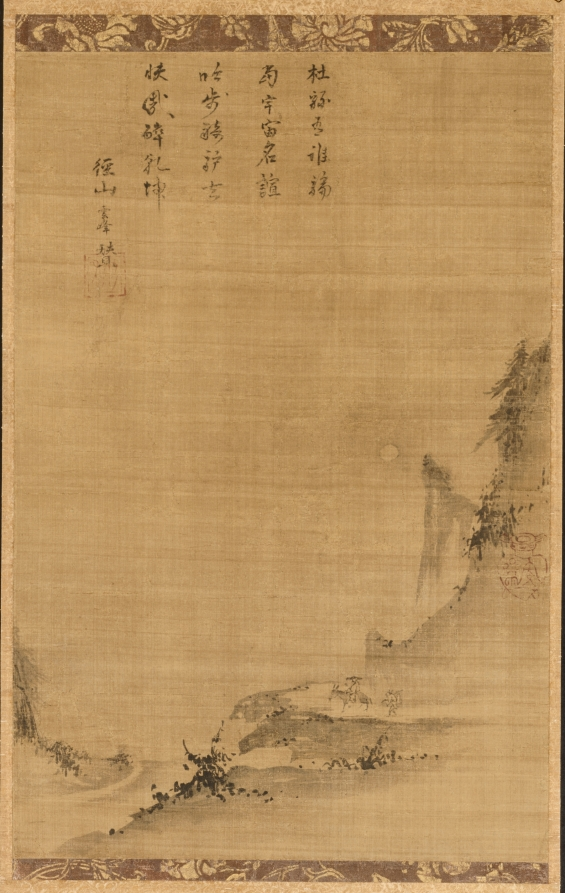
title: Mountain Landscape in Moonlight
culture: China, Southern Song dynasty (1127–1279) to Yuan dynasty (1271–1368)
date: 1200s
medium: hanging scroll; ink on silk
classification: Painting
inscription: 2 unidentified seals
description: Painted in modulated monochrome ink washes with dark dots for foliate accents, the anonymous artist successfully suggests the dense atmosphere of a warm summer night. Under a full moon a scholar rides a mule, accompanied by a servant who carries his belongings. The poem inscribed by Chan (Zen) priest Yunfeng Miaogao identifies the figure as the Tang dynasty poet Du Fu 杜甫 (712–770). Who rides Du [Fu]'s mule: Through the universe his name resounds. Chanting poems as he rides off on his mule, How quickly does he become drunk with Heaven and Earth!